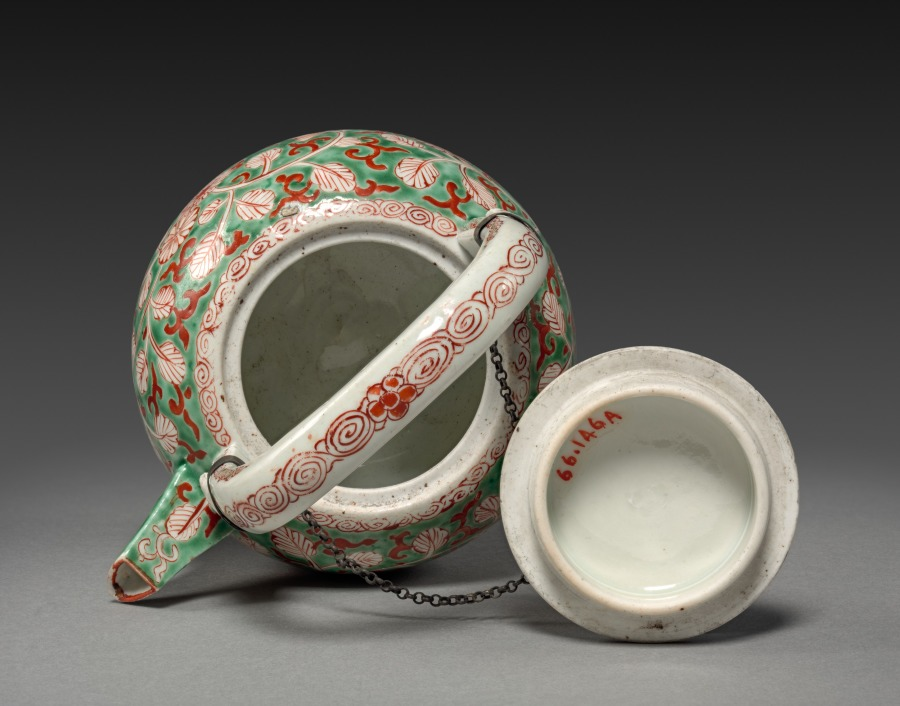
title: Wine Pot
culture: Japan, Edo period (1615–1868)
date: 1615–1868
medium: porcelain with colored enamel decoration (Hizen ware, Arita type)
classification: Ceramic